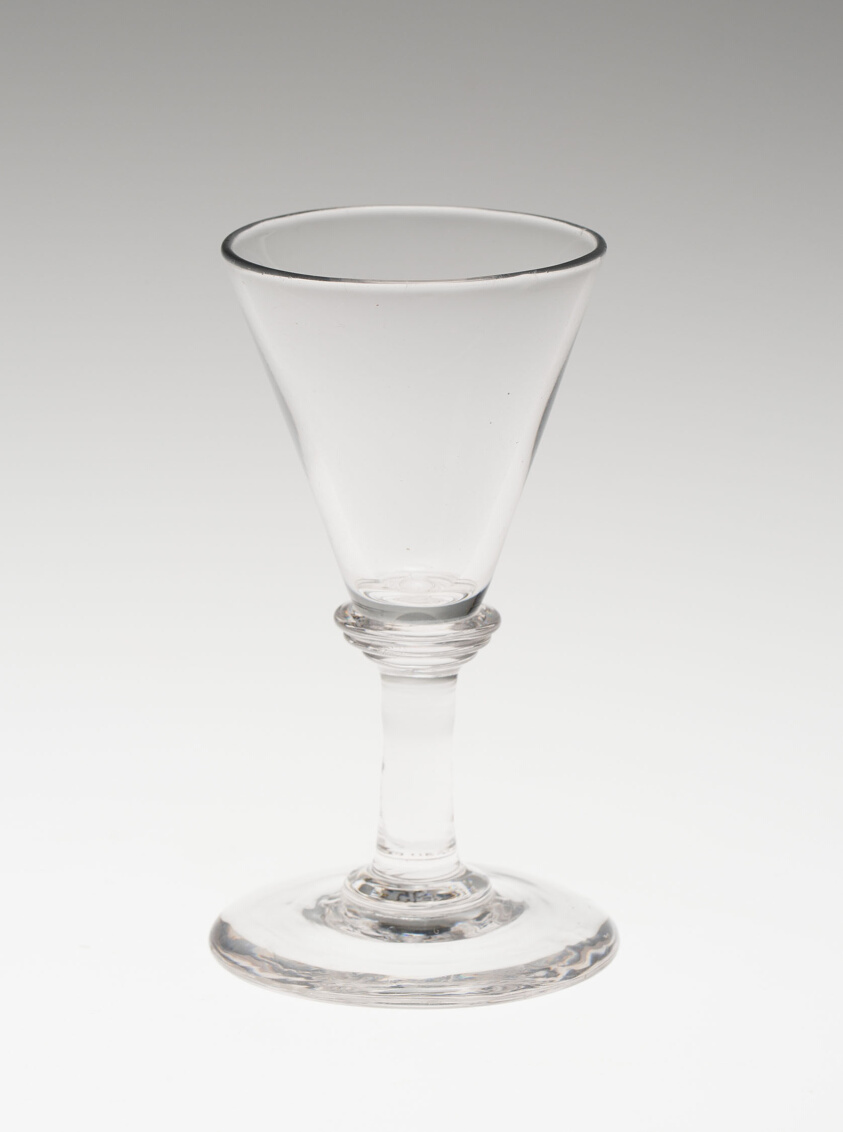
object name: Glass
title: Ale Glass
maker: England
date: 1750/1850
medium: Glass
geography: England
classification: drinking vessel; glass